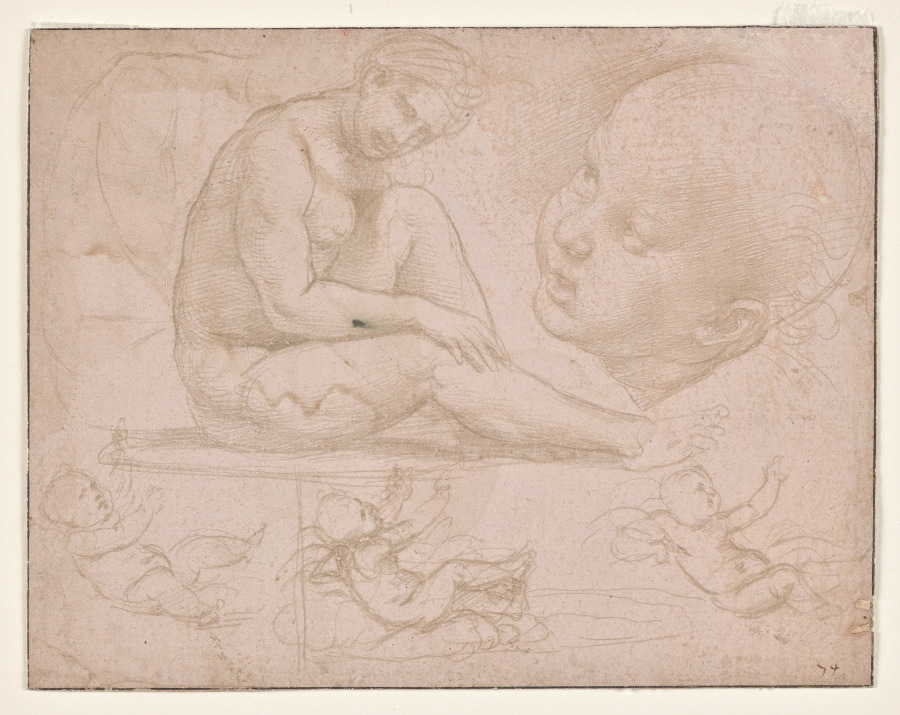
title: Studies of a Seated Female, Child's Head, and Three Studies of a Baby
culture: Italy, 16th century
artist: Raphael (Italian, 1483–1520)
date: c. 1507–8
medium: metalpoint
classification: Drawing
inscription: lower right, in brown ink: 74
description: This drawing is from Raphael’s "pink sketchbook," comprised of ten sheets of roughly equal size that each portray variations of a mother and child. Today, six of the drawings at the Palais des Beaux-Arts, Lille; two are at the British Museum; one is in a private collection; and one is in Cleveland. The small format of the sheets would have enabled the artist to carry the notebook as he traveled from Florence to Rome in 1508. Raphael used metalpoint, a technique popular in 15th- and early 16th-century Italy on a pink prepared surface. The pose of the infant's head in the drawing was based on that of the Christ child in Leonardo da Vinci's Benois Madonna, then in a private collection in Florence, with changes—such as the uplifted eyes and open mouth—made by Raphael. The curving back of the female nude is echoed in the roundness of the child's head. The three sketches of a reclining infant at the bottom of the sheet are freely handled and improvisational, relaying the child's squirming, continuous movement with repeated contour lines.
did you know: This sheet was probably once part of a sketchbook carried by the artist Raphael on a 1508 journey between Florence and Rome.